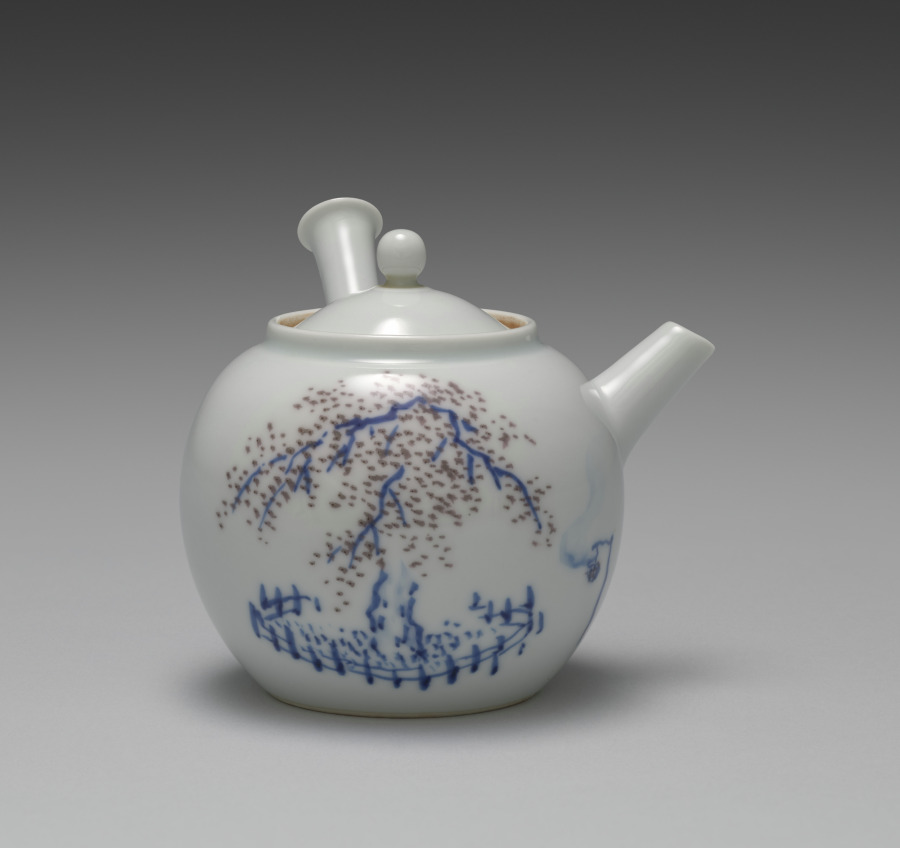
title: Teapot with Cherry at Night in Gion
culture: Japan, Meiji period (1868–1912)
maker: Seifū Yohei III (Japanese, 1851–1914)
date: 1893–1914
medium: Porcelain with underglaze blue and iron oxide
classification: Ceramic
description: This side-handled sencha teapot with the cherry tree has a nearly spherical shape, and its recessed lid has an ovoid knob. It has both blue and a purplish brown under the glaze for the blossoms and embers on one side, and the vertical calligraphy identifies the tree as a cherry tree at night in the Gion area of Kyoto. To the right of the tree, smoke billows from a small lantern fire in a basket suspended on a post. In terms of collecting history, a paper inserted into the box of Teapot with Cherry at Night in Gion is of interest. It is a flyer for Yamamoto Shōseidō, a shop (no longer extant) that sold fine Kyoto ceramics in Osaka.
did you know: This teapot features the Japanese theme of a blossoming cherry tree in the Gion area of Kyoto in underglaze blue and brown.